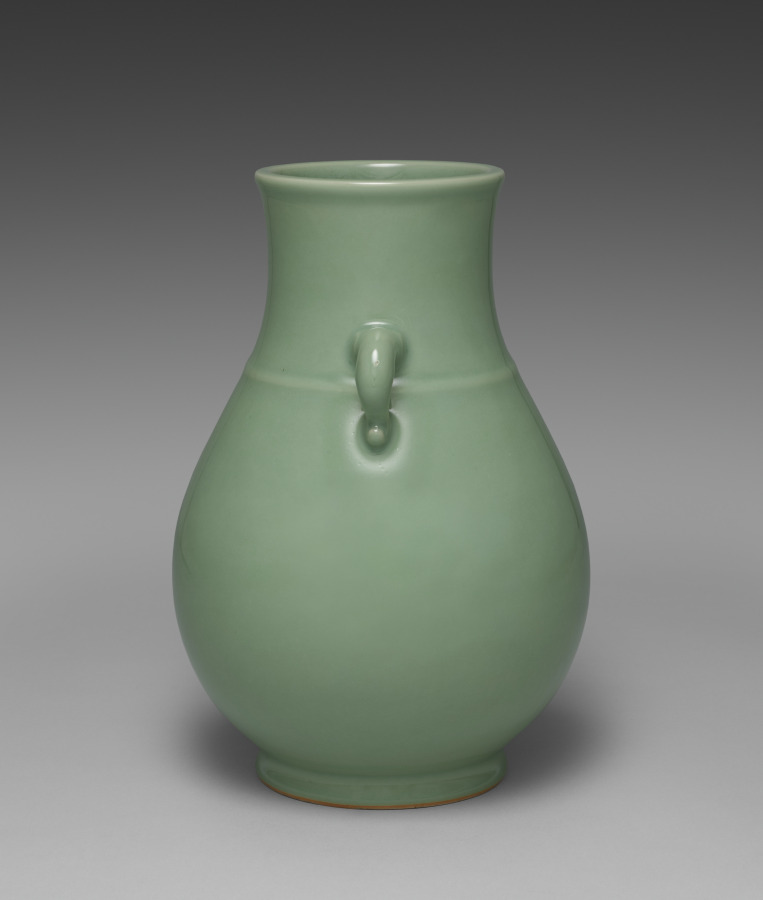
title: Hu-Shaped Vase with Handles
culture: Japan, Taishō period (1912–26) or Shōwa period (1926–89)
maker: Seifū Yohei IV (Japanese, 1872–1951)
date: 1914–46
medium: Porcelain with molded and carved design and green glaze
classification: Ceramic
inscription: 清風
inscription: 成山清風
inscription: 清風造【印】清風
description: Many of the vases created by Yohei III and IV were made with reference to and in emulation of Chinese ceramics in both form and glazing. The Seifu studio was inspired by later Chinese copies of two other archaic vessel types, the hu (Japanese ko) and guan (Japanese kan). In simple terms, in their original contexts, the hu and guan were storage jars that also appeared in ritual contexts. This hu-form vase by Yohei IV has a green glaze and handles in the shape of an elephant head. The details of the elephant heads are quite easy to miss, but a close look reveals that each has carved eyes with pupils defined, tiny ears and tusks in very low relief, and a curved trunk with the end curled up. This sort of container is even known as the “elephant ear” type. The only other decorative element on the vase’s pear-shaped body is a raised cordlike band around the shoulders.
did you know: The handles are shaped like elephant heads.